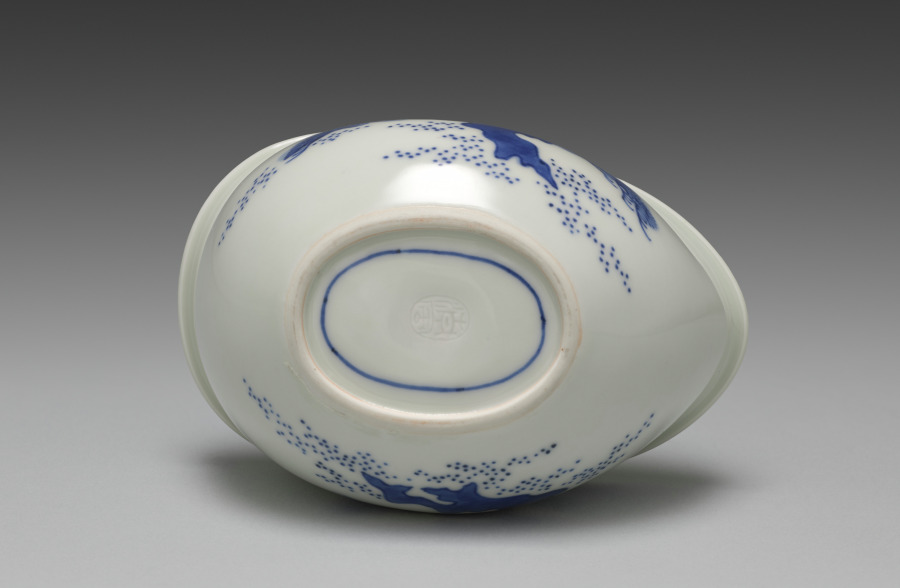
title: Water Cooler with Pines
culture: Japan, Meiji period (1868–1912)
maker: Seifū Yohei III (Japanese, 1851–1914)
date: 1893–1914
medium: Porcelain with underglaze blue and molded designs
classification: Ceramic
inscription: The center of the base contains an ovoid “Seifu” seal.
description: Hot water coolers, or yuzamashi, are essential components of sencha tea sets. Yuzamashi are used to cool boiled water to the ideal temperature for the type of tea to be brewed. The kidney-like shape of this one permits it to be cradled in one hand, following curvature of the palm, with the tips of the thumb and index finger each pressed against a nyoi staff-head-shaped applied form, perfectly placed to ensure a stable hold. Someone pinching the cooler in this way would have enough protection from the heat to maintain a steady grip but also sufficient contact along the base of thumb to assess the water temperature. On each of the cooler’s two longer sides, a pine tree in grass or sand is painted under the glaze in cobalt blue. The tree on one side has two main roots and two large branches, while that on the other has a single, thick, curved line from root to tip with racks of needles spreading across the width of the sky. A blue oval is traced along the footring, and the center of the base contains an ovoid “Seifu” seal.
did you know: Evergreen, pines have associations with eternal youth and longevity.